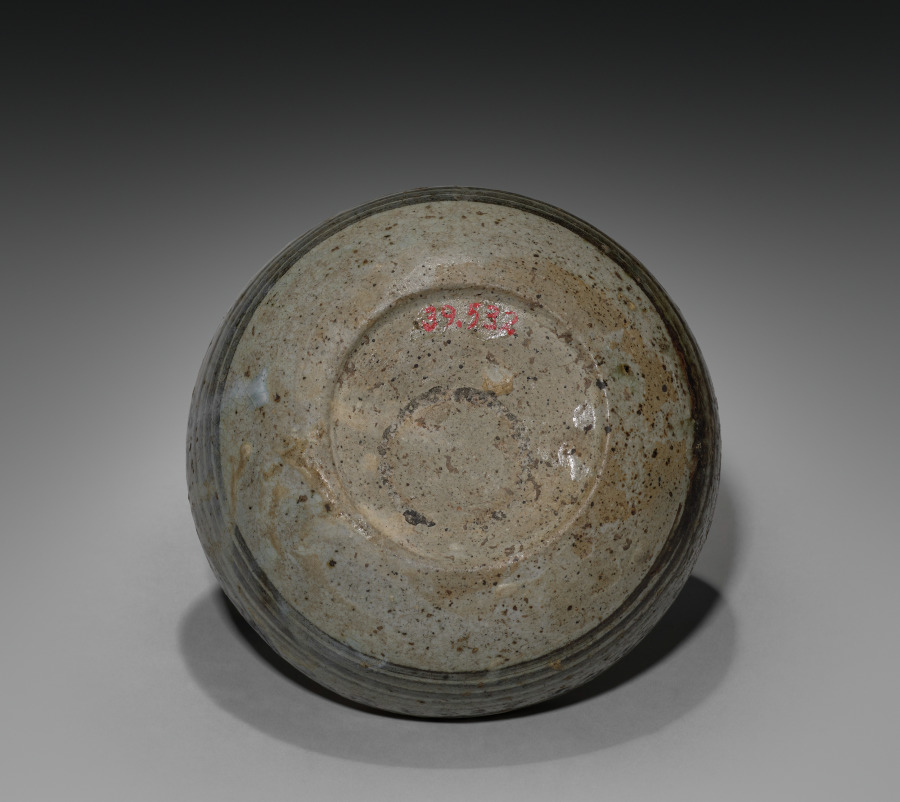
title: Covered Bowl with Painted Decoration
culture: Siam, Sawankhalok ware, 15th century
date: 1400s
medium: stoneware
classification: Ceramic